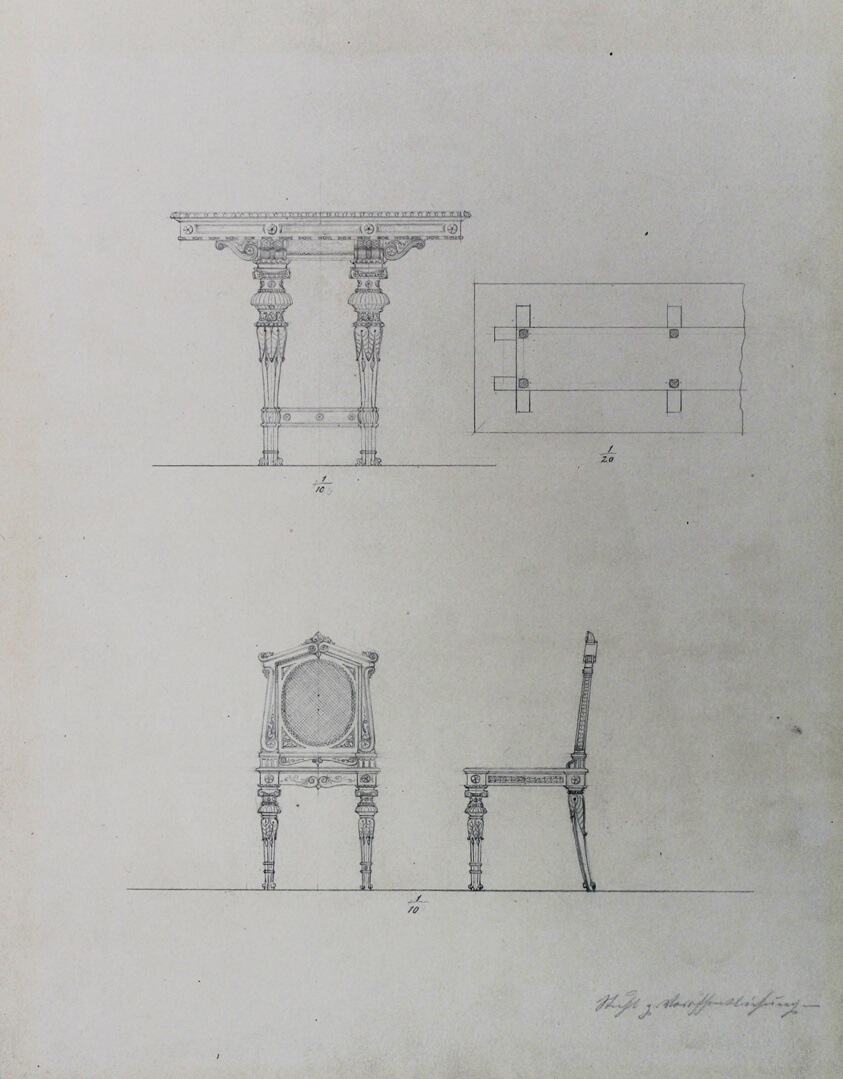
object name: Architectural Drawing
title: Design Projects, Table and Chair Elevations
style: 19th century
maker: Carl (Charles) J. Furst (American, born Germany 1840–1919)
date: c. 1860–1870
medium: Graphite on drawing paper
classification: industrial design; design; architectural drawing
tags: furniture, chairs, tables, design